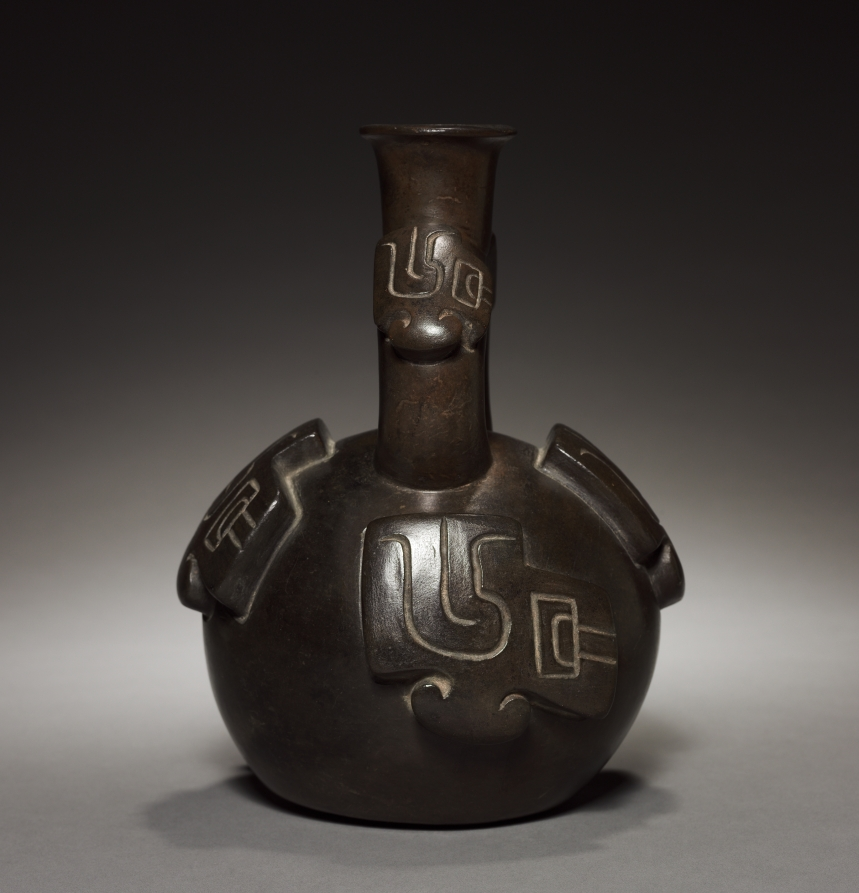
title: Vessel with Stirrup Spout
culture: Peru, likely modern, inspired by the Cupisnique style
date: 1900s (thermoluminescence date)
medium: earthenware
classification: Ceramic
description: The stirrup spout first appeared on the North Coast in the ceramics of the Cupisnique culture, a Chavín contemporary, and remained an important North Coast spout form until the time of the Spanish conquest. It probably had symbolic meaning, now lost.